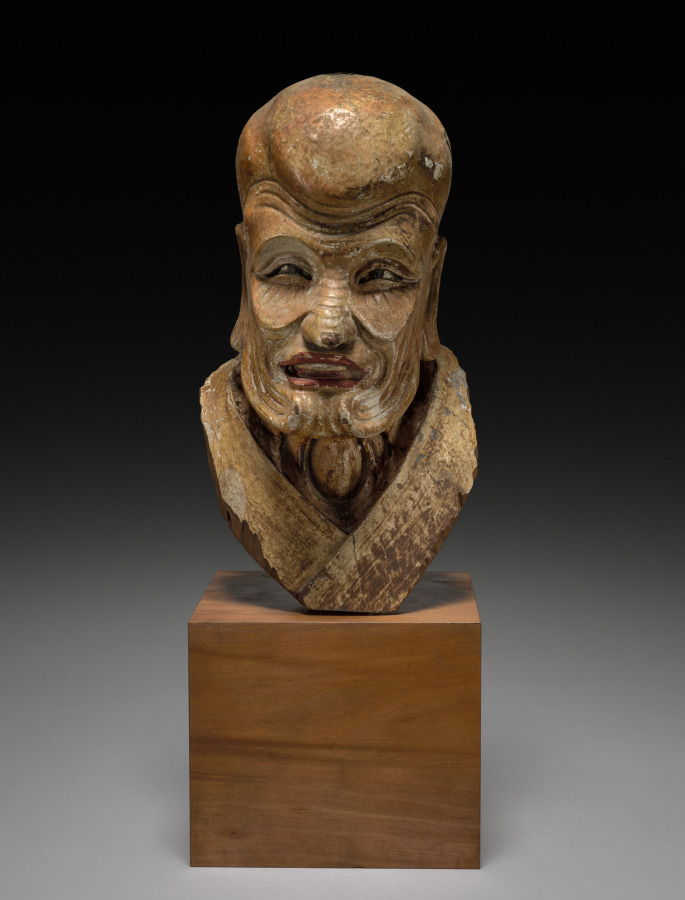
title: Head of a Patriarch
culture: China, Ming dynasty (1368-1644) or earlier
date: 1368–1644 or earlier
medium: wood covered with lacquer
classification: Sculpture